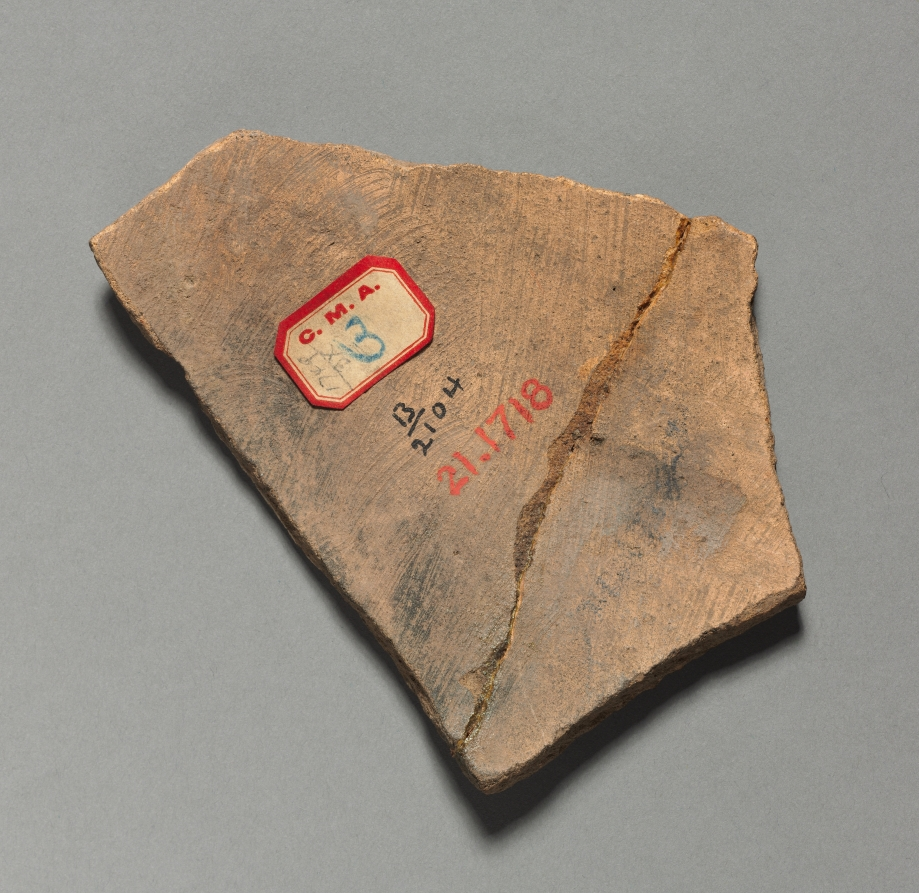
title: Fragment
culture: Peru, Inka, 1400-1532 AD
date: 1400–1532 AD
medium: pottery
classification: Ceramic